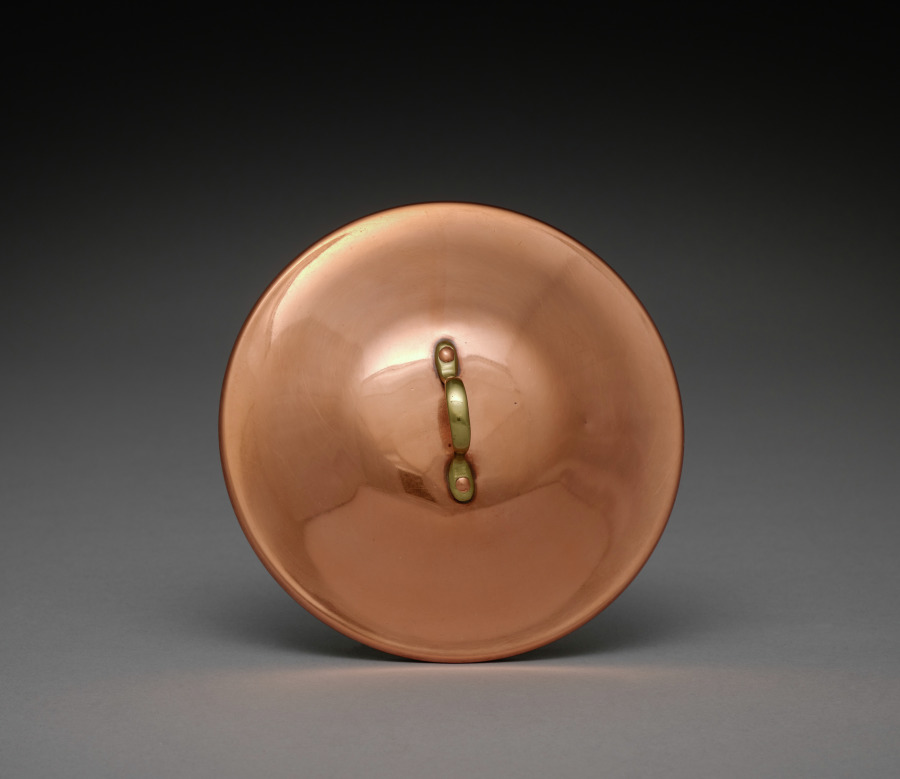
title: Cover for a Pot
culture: Russia, St. Petersburg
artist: firm of Peter Carl Fabergé (Russian, 1846–1920)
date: 1914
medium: copper with brass handles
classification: Metalwork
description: As Russia entered the First World War, austerity and economy settled into the fabric of life even among wealthy aristocrats and nobility. Not only were precious materials such as gold, silver, and gemstones hard to procure, but such luxury seemed out of place when so many men were dying at the front. Fabergé contributed to the war effort by making shells, casings, and other munitions out of brass and copper. He also made cookware, such as this small covered soup pot, to be sent to the front lines with provisions tucked inside. However, these simple forms only looked affordable. They were still a luxury only the wealthiest families could afford to send to their sons.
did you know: This lid is the cover for a copper soup pot that was sent to the front lines filled with provisions during the First World War.